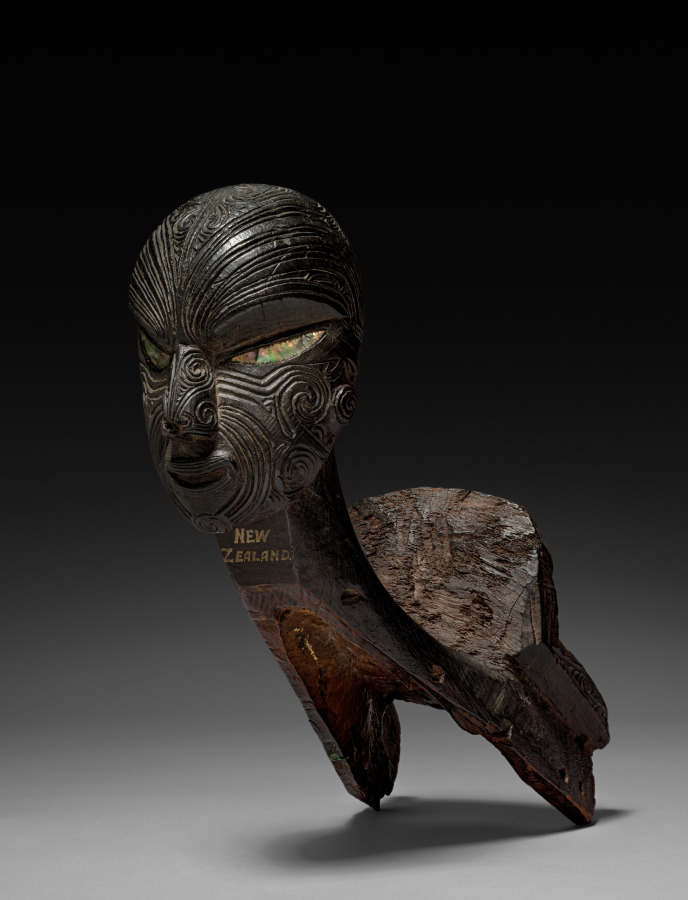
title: Fishing Canoe Prow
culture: Polynesia, New Zealand, Maori people, 19th century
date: 1800s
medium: wood with haliotis (pearl) shell inlay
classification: Sculpture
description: Intricate surface patterning characterizes Maori wood carvings. The swirls and spirals covering the face on this canoe prow replicate traditional facial tattoo patterns. Similar designs were used for post and gable figures that adorned both dwellings and compounds.